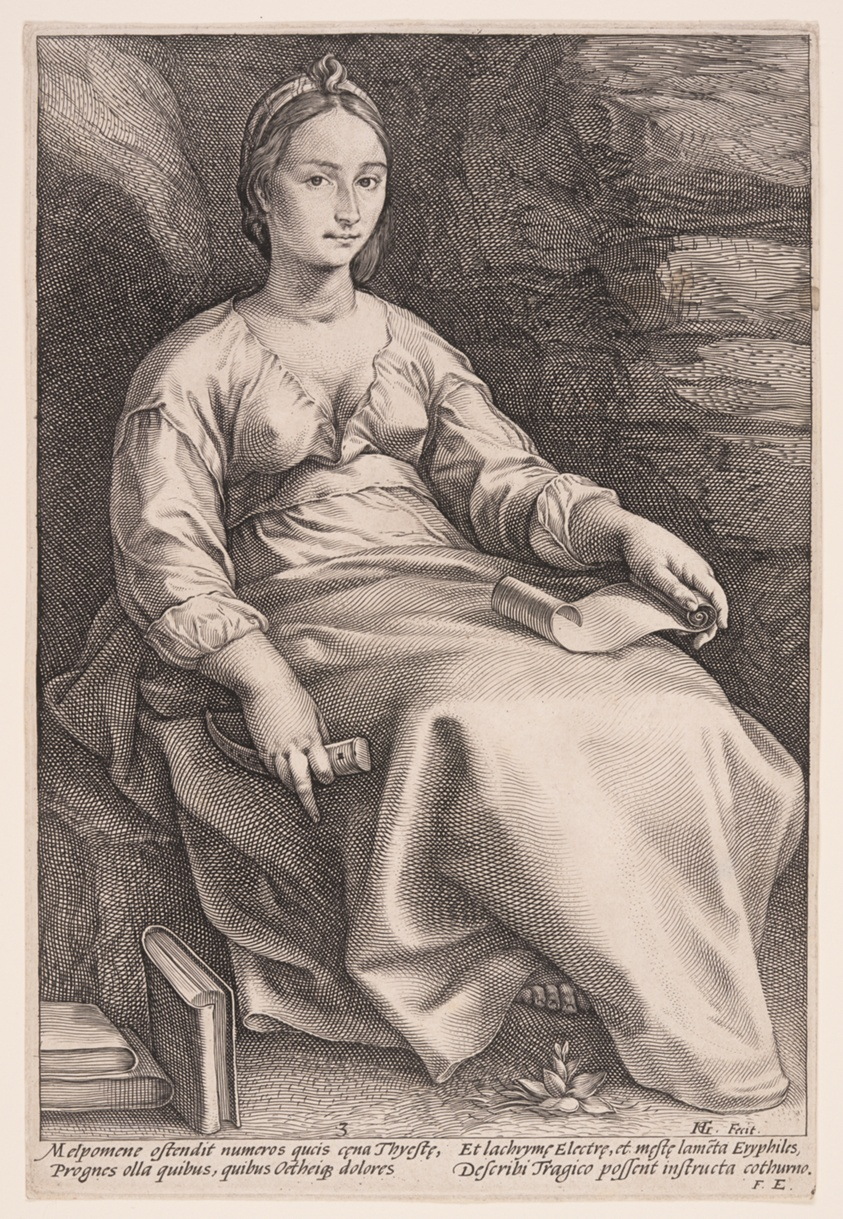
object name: Print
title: Melpomene, The Muse of Tragedy, from The Nine Muses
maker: Hendrick Goltzius (Dutch, 1558–1617)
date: 1592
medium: Engraving on laid paper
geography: Netherlands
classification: print; engraving; paper; prints and drawing